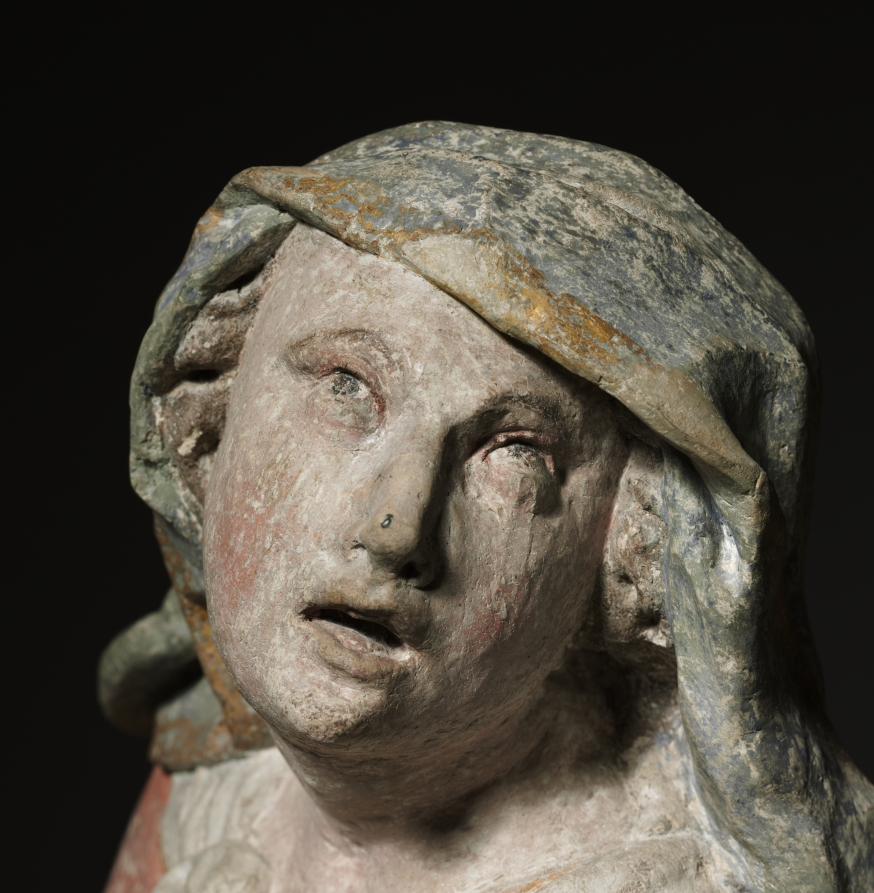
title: Mourning Mary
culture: Austria, Vienna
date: c. 1710–40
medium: stone with traces of original color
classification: Sculpture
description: This figure’s orientation suggests it may have been part of a Crucifixion group, situated to the left of Christ with another figure to the right to balance the composition. Fingers knotted in prayer, lips parted in anguish, the Virgin appears to recoil from the sight of her son on the cross. Her contorted pose and agitated draperies are visible manifestations of her grief. Obvious signs of wear to the stone suggest that the group may have been set outside of a church, perhaps atop pillars.